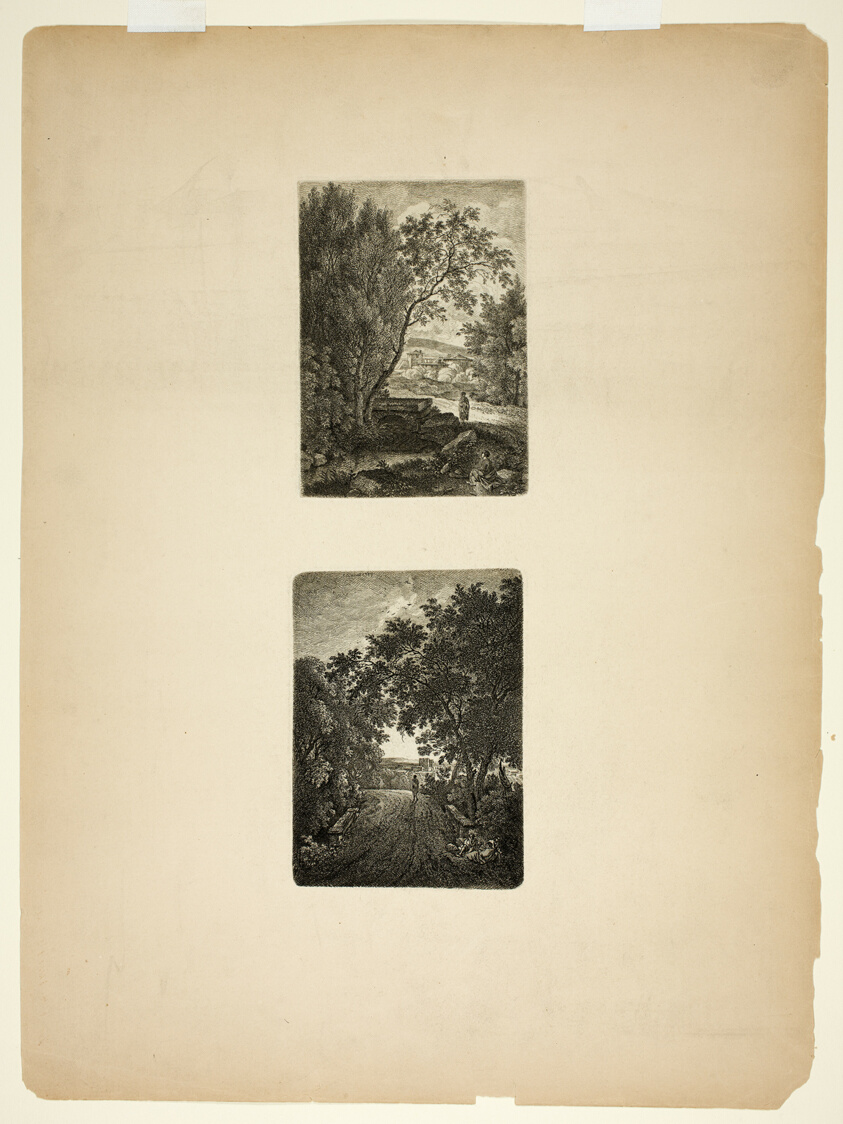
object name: Print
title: Two Italian Landscapes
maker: Wilhelm Alexander Wolfgang von Kobell (German, 1766-1855)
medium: Etchings on paper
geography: Germany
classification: etching; print; prints and drawing